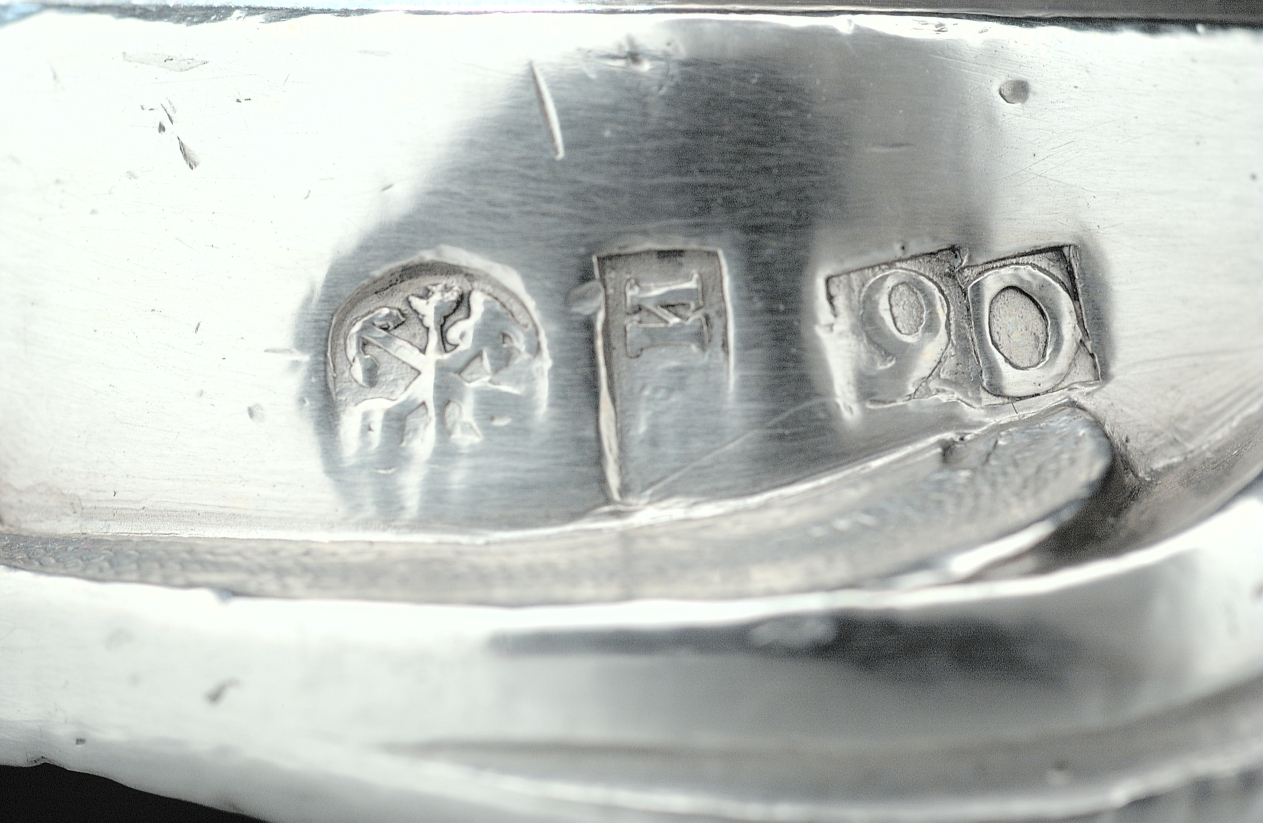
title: Candelabrum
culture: France, Paris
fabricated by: François Thomas Germain (French, 1726–1791)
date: 1757–58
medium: silver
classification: Silver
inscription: [Charge mark of Eloy Brichard , 1756−1762, beneath base]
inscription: [Warden's mark for Paris, 1757-1758, beneath base]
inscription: [Discharge mark for work intended for export, 1756−1775, on base]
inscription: [Hallmarks for Saint Petersburg, on base]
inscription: [Assayer mark of Ivan Frolov, on base]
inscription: [Russian standard of the French silver, on base]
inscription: [Maker’s mark of Francois-Thomas Germain, master silversmith on October 16, 1748, beneath drip pan one each of three bobeches]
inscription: [Charge mark Of Eloy Brichard, 1756−1762, beneath drip pan one each of three bobeches]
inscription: [Discharge mark for work intended for export, 1733 (?)−1775, beneath drip pan one each of three bobeches]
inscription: [Warden's mark for Paris, 1757−1758, beneath drip pan one each of three bobeches]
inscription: [Assayer mark of Ivan Frolov, beneath drip pan of one of three bobeches]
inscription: [Russian standard of French silver, beneath drip pan of one of three bobeches]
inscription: [Charge mark for large work of Eloy Brichard, 1756−1762, on candelabra bayonet attachment]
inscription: [Discharge mark for work intended for export, on candelabra bayonet attachment]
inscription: [Beneath base]: “Fait. Par. F. T. Germain. Sculp[teu]r. Orf[ev]re. Du Roy. Aux. Galleries. Du Louvre. A Paris. 1758”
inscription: [Beneath base]: "Du no.32"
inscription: [Beneath base]: "No 465"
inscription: [Engraved Russian Imperial coat-of-arms, beneath base]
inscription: [Modern inscription in a round paper label, beneath base]: “[?]8” [printed in black]: “3120” [written in pencil]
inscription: [Modern inscription in a rectangular paper label, beneath base]: “…IN/FRANCE” [printed in black]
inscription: [Modern inscription in a rectangular paper label, beneath base]: “46” [written in black ink]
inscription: [Engraved cipher composed with two “M”’s (?) surmounted by a royal crown, on base]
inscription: [Engraved, on base]: "No 465"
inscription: [Engraved, on base]: "du No 32"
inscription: [Engraved cipher composed with two “M”’s (?) surmounted by a royal crown, on one bobeche]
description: This candelabrum is part of a pair. Its design blurs the line between function and decoration. The arms twist and curve, appearing as flower stems while physically supporting the candles. Though this visual unity is typical of the Rococo style, the influence of the rising neoclassical style is evident in the allegorical scenes of light that decorate each candelabra’s stem.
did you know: These candelabra are part of a dinner service sent from Paris, France, to Saint Petersburg, Russia, in two separate shipments, the first of which contained 270 objects for 8 dozen place settings.